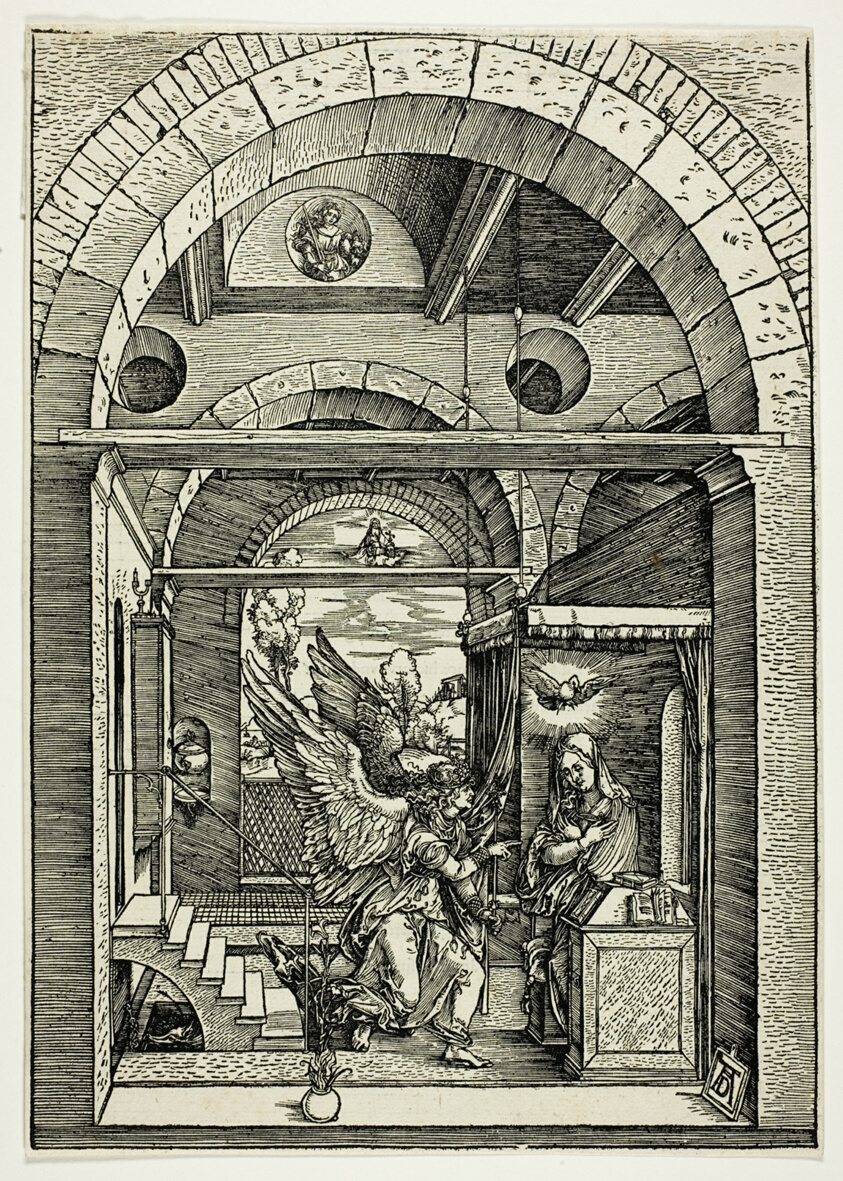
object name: Print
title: The Annunciation, from The Life of the Virgin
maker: Albrecht Dürer (German, 1471-1528)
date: c. 1503, published 1511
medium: Woodcut in black on ivory laid paper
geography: Germany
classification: woodcut; print; prints and drawing; paper